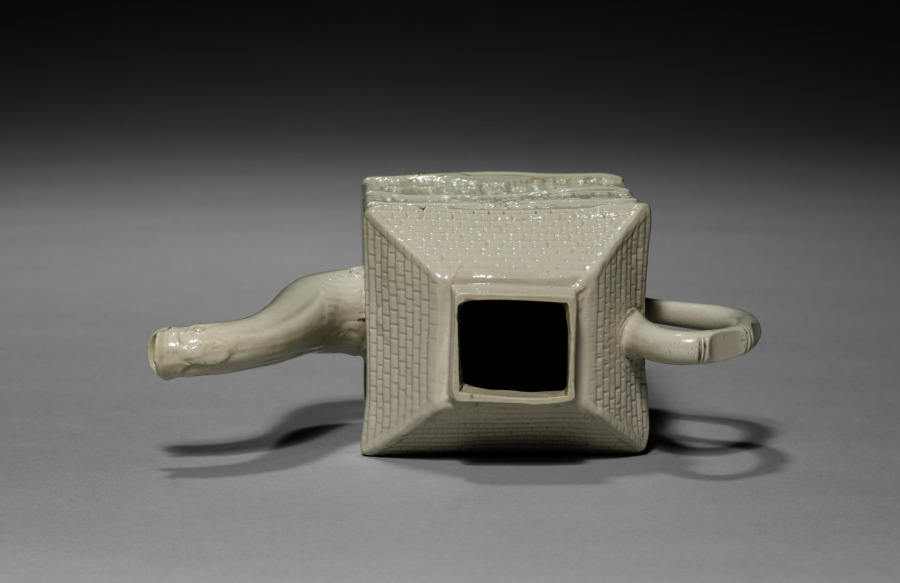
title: Teapot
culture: England, Staffordshire, 18th century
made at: Staffordshire Factory (British)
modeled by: Aaron Wood (British)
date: 1740–1750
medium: salt-glazed earthenware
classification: Ceramic